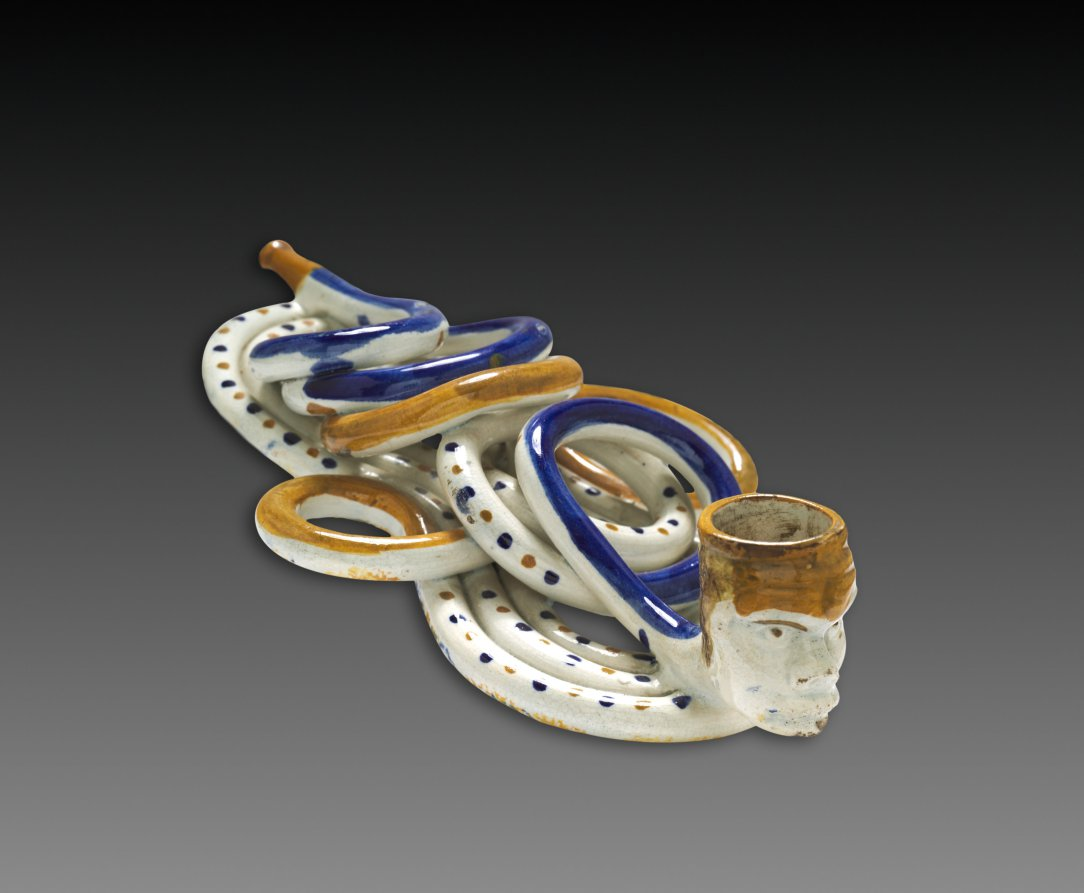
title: Pipe in the Form of a Twisted Man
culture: England, Staffordshire, late 18th-early 19th Century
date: 1780–1820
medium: lead-glazed earthenware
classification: Ceramic